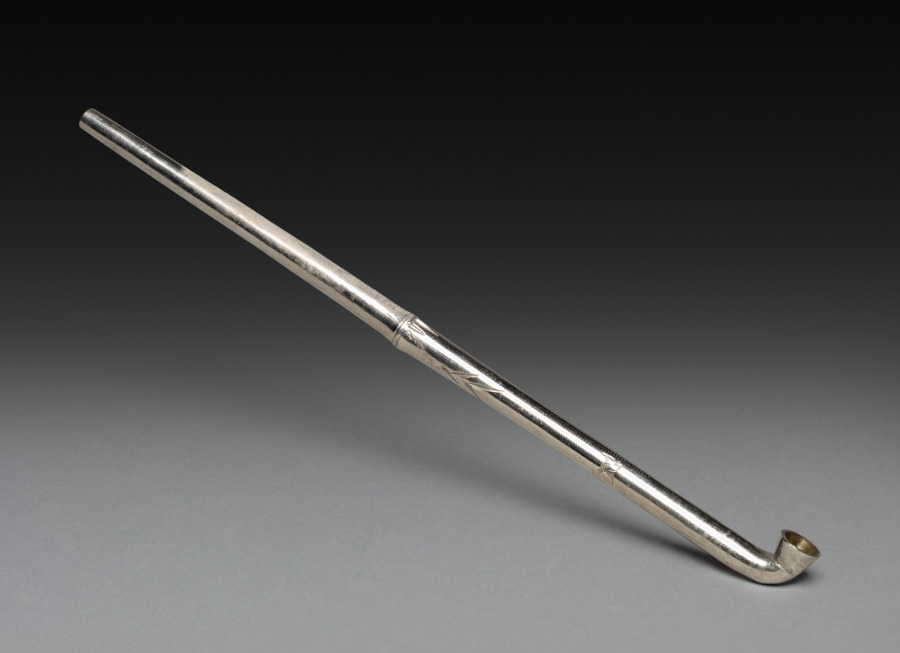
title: Tobacco Pipe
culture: Japan, Meiji period (1868–1912)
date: 1900s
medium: metal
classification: Miscellaneous